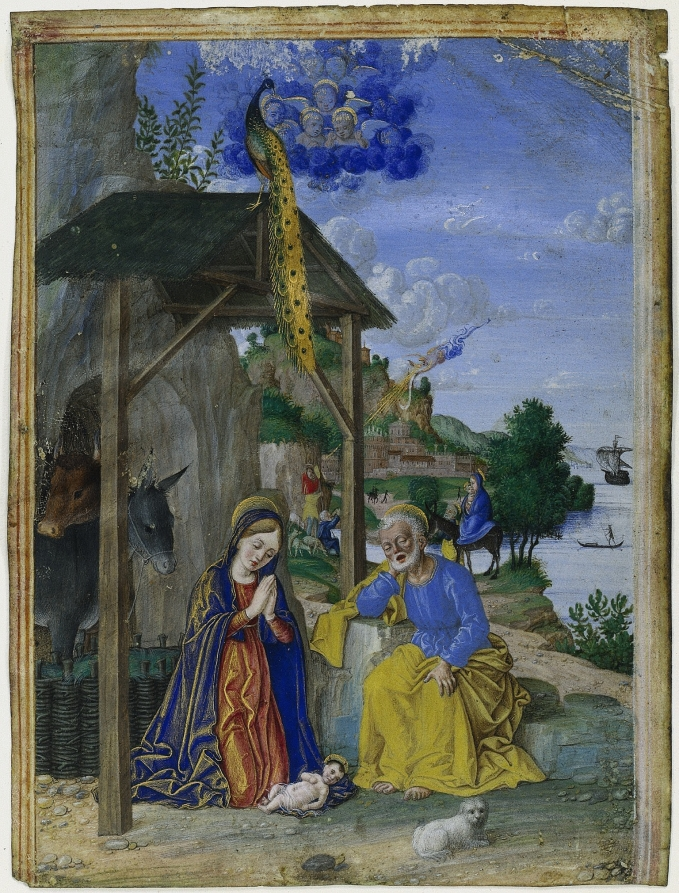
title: Single Miniature: The Nativity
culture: Italy, Verona, 16th century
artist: Girolamo dai Libri (Italian, 1474–1555)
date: c. 1515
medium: tempera and gold on parchment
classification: Manuscript